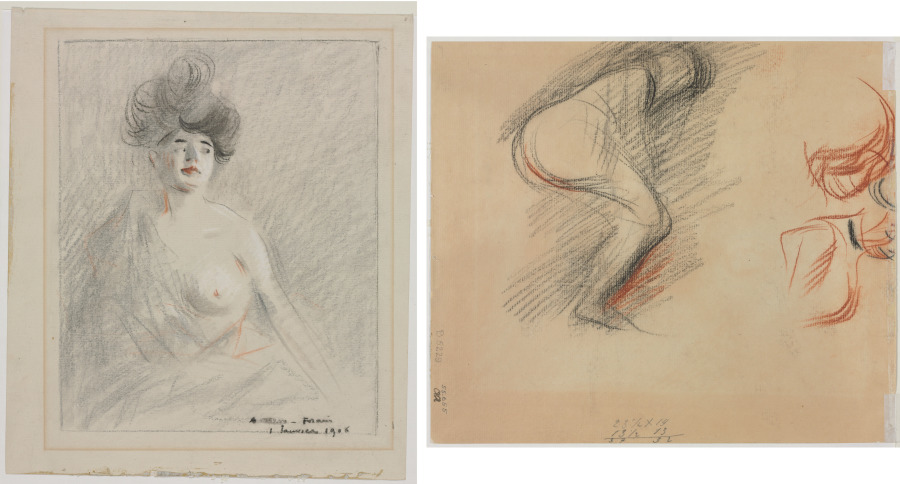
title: Courtesan (recto) Figure Sketches (verso)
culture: France, early 20th Century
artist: Jean Louis Forain (French, 1852–1931)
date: 1906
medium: black, red, and white chalk; framing lines in black chalk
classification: Drawing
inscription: signed, lower right, in black crayon: A [illegible, scraped away] - Forain / 1 Janvier 1906